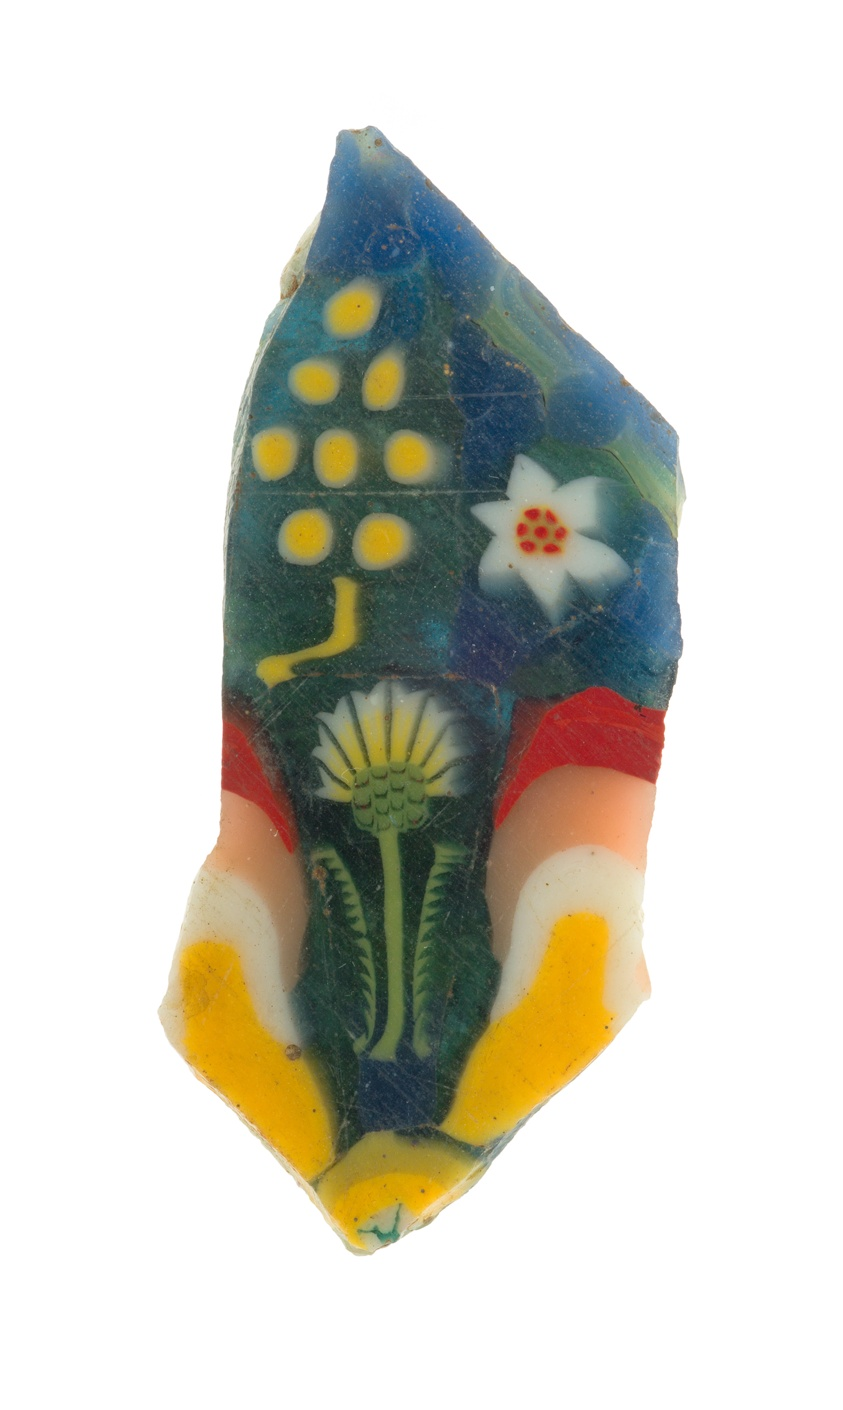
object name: Decorative Arts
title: Fragment of a Floral Plaque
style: ptolemaic, greco-roman (egyptian), ancient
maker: Egyptian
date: late 1st century BCE-early 1st century CE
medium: Glass, mosaic technique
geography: Egypt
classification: fragment; decorative arts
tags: floral